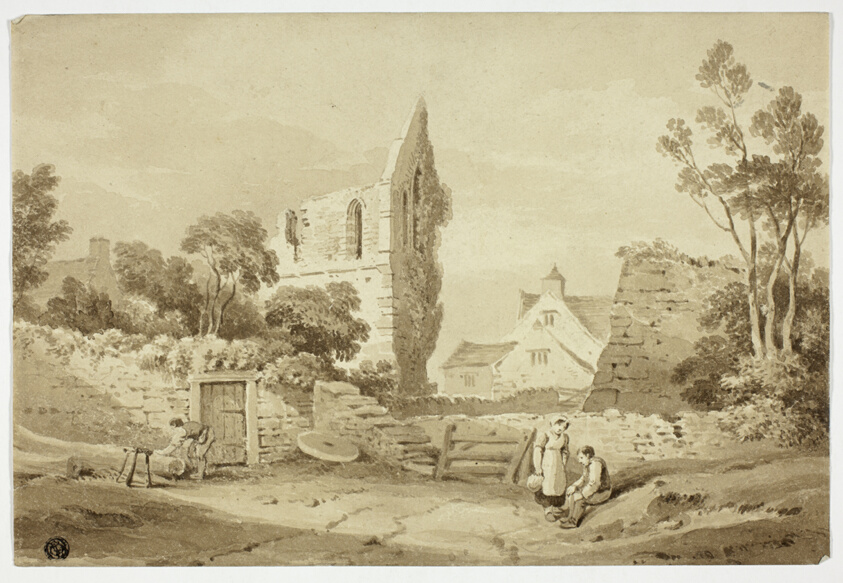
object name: Drawing and Watercolor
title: Wenlock Abbey, Sharpshire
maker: George Augustus Holmes (English, active 1852-1911)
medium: Brush and brown wash, over traces of graphite, on cream wove paper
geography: United Kingdom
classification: ink or chalk wash; brush and wash; drawings (visual works); prints and drawing; paper